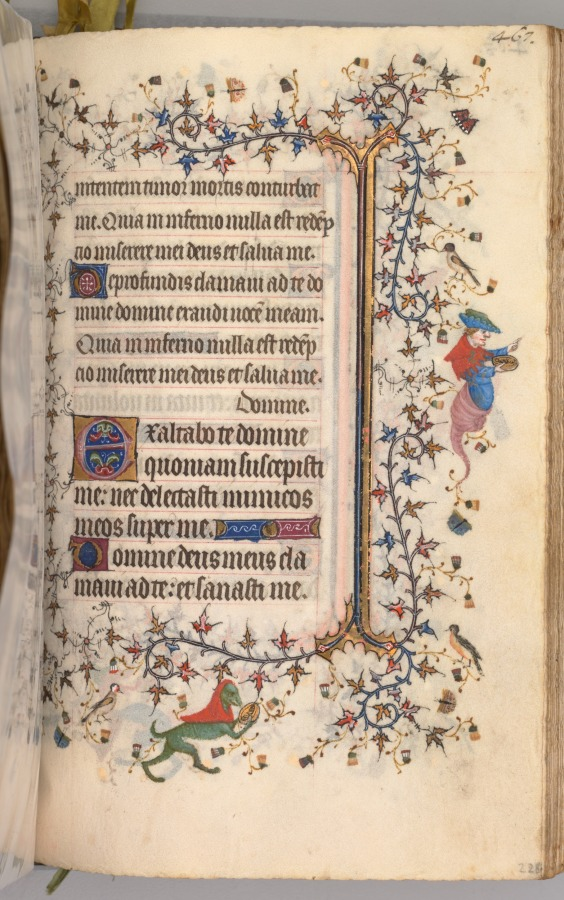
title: Hours of Charles the Noble, King of Navarre (1361-1425): fol. 228r, Text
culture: France, Paris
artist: Master of the Brussels Initials and Associates (French)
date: c. 1405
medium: ink, tempera, and gold on vellum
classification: Bound Volume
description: This precious volume was obviously highly prized by its owner, the French-born King of Navarre, who had his coat of arms painted on no less than twenty folios. Rather than directly commissioning this manuscript from a specific workshop, it seems that Charles the Noble acquired his book of hours -- perhaps ready-made for the luxury market -- while on a trip to Paris in 1404-05. A collaborative effort, six painting styles are evidenced within the pages of this codex, those of two Italians, two Frenchmen, and two Netherlanders. The painter who was responsible for the planning and decoration of the book, and who produced seventeen of the large miniatures, was a Bolognese artist known as the Master of the Brussels Initials. His principal assistant, responsible for most of the borders, was a Florentine who signed his name "Zecho" da Firenze on folio 208 verso.